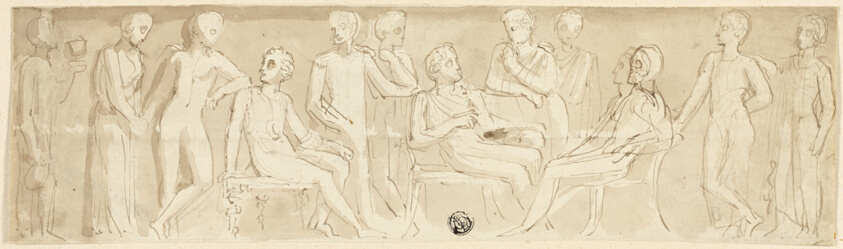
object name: Drawing and Watercolor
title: Frieze Design in Classical Manner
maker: Thomas Stothard (English, 1755-1834)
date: c. 1800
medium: Pen and brown ink with brush and brown wash, over graphite, on ivory laid paper, tipped onto tan wove paper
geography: England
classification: ink or chalk wash; drawings (visual works); prints and drawing